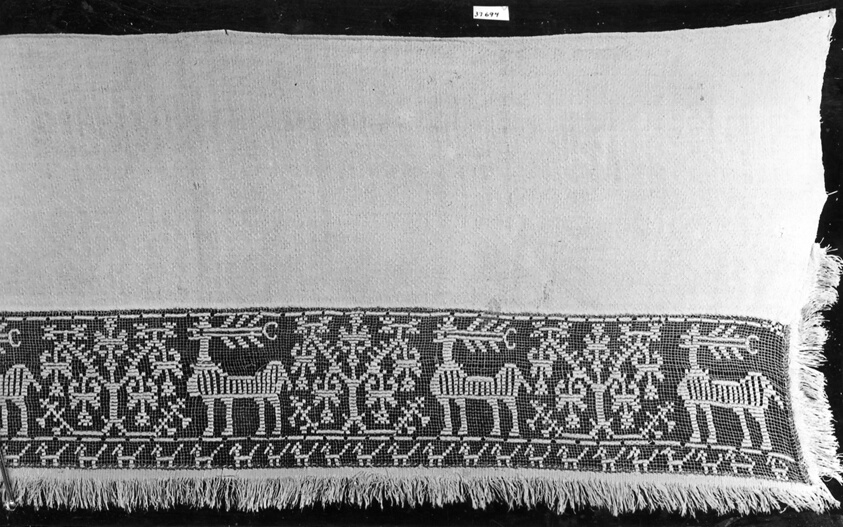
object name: Religious/Ritual Object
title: Altar Cover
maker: Italy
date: 18th century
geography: Italy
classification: textile; needlework (visual works); altar; ritual objects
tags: altar